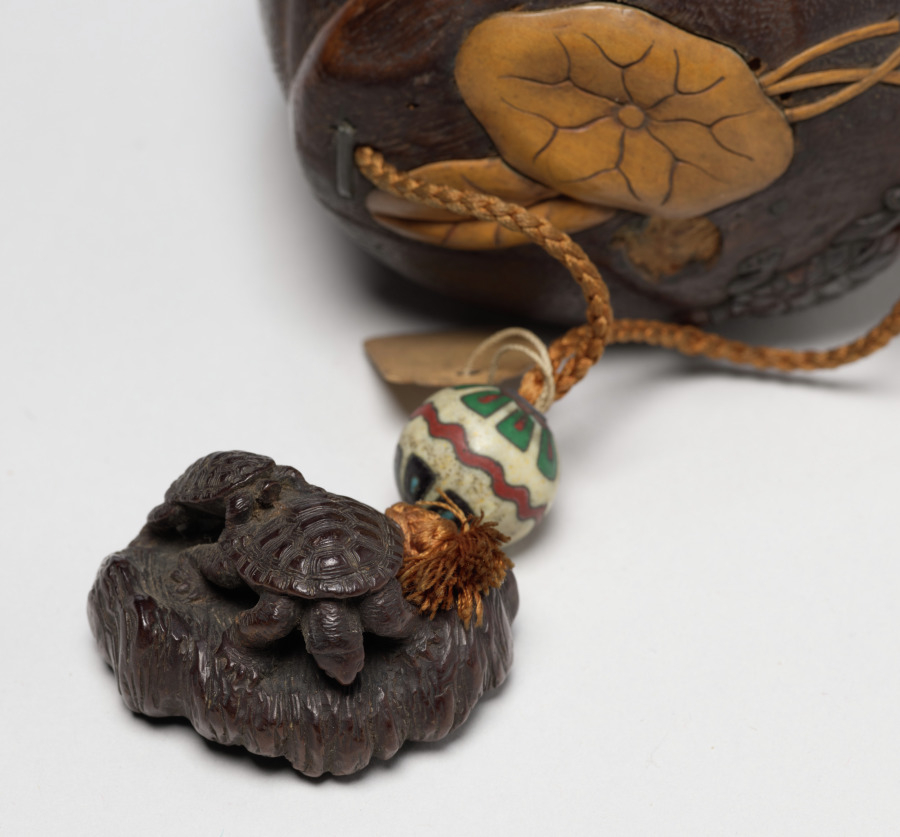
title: Tobacco Box with Turtles in Lotus and Grasses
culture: Japan, Edo period (1615–1868)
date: c. 1760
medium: Box: wood with color and metal, shell, and stone inlay; toggle (ojime): ceramic; netsuke: wood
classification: Miscellaneous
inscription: Box signed: 岷江 花押; sealed: 岷江; netsuke signed: 栗斎